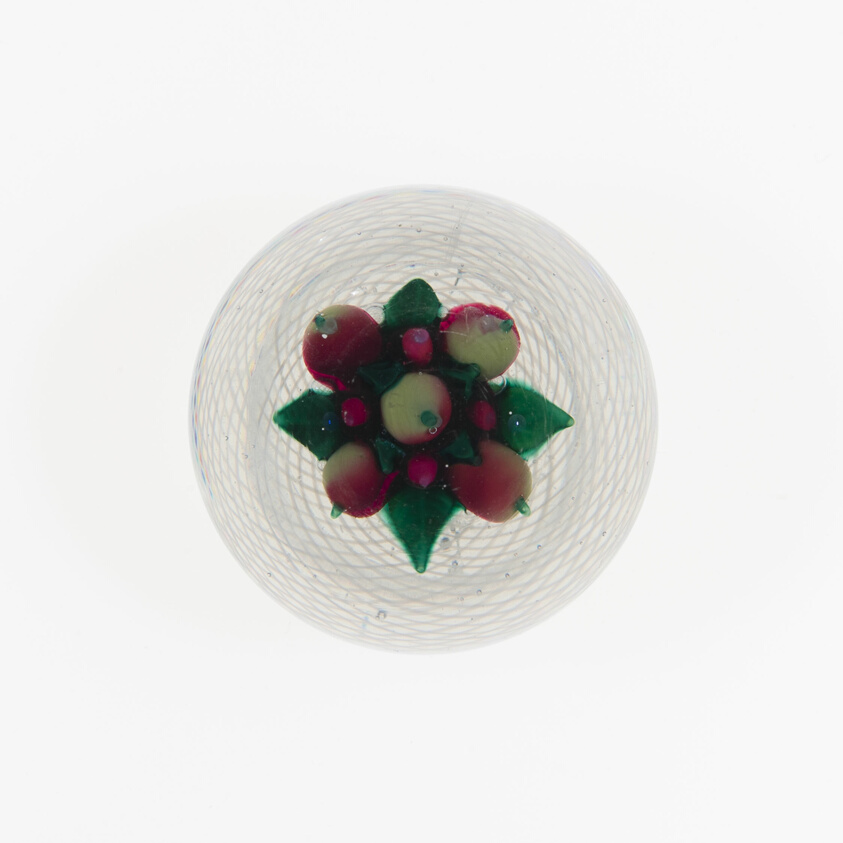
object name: Glass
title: Paperweight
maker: New England Glass Company (Cambridge, Massachusetts, 1818-1888)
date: Late 19th century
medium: Glass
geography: United States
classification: paperweight; fauna/flora/fruit; european decorative arts; glass